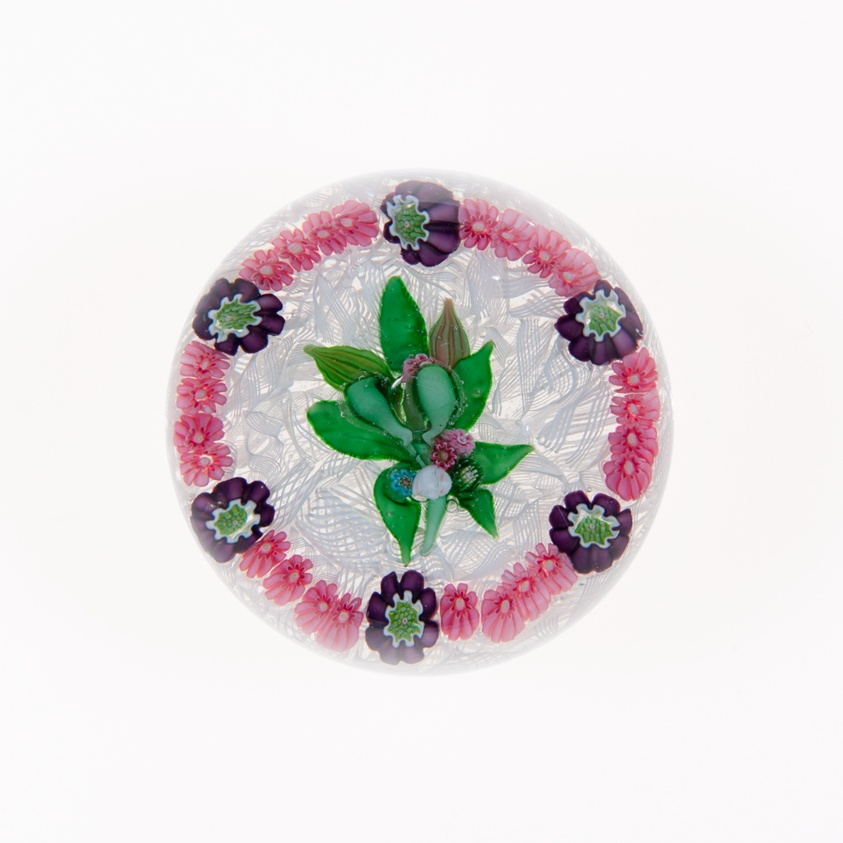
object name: Glass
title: Paperweight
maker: Clichy Glassworks (Cristalleries de Clichy); Clichy, France, 1837-1885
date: c. 1845–60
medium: Glass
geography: Clichy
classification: paperweight; glass